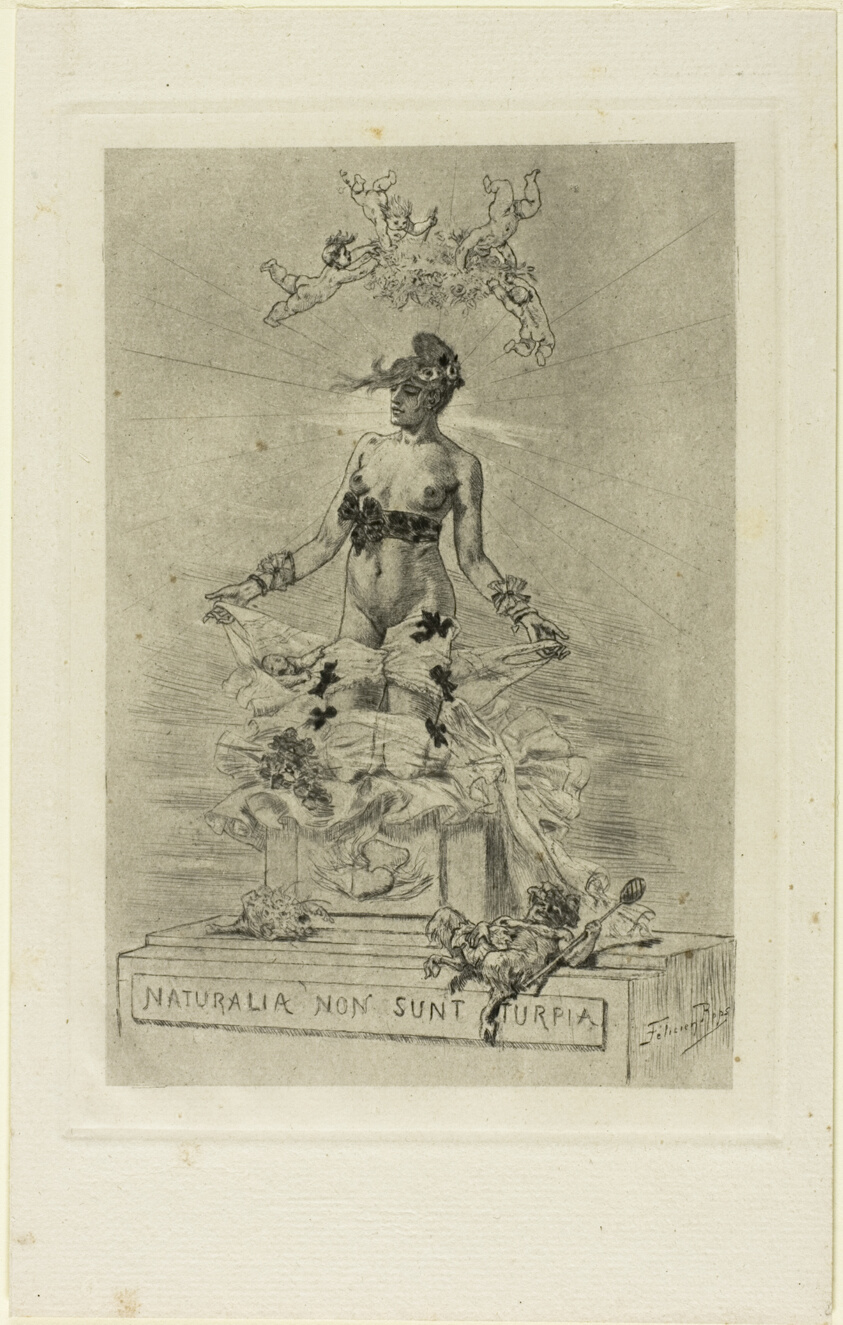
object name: Print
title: Offering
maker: Félicien Rops (Belgian, 1833-1898)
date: 1895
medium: Heliogravure, with drypoint, on ivory laid paper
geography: Belgium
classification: photogravure; print; prints and drawing